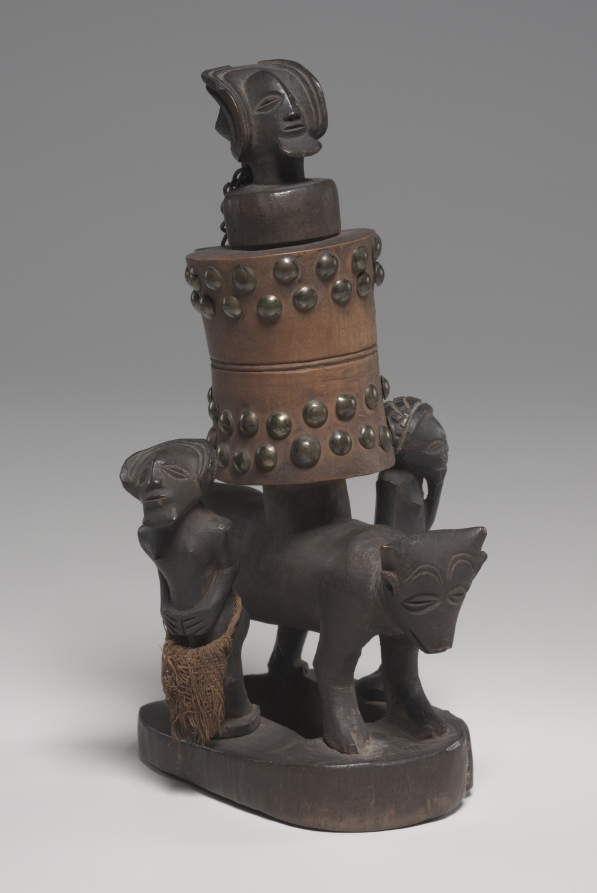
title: Snuff Mortar (Tesa Ya Ma Kanya)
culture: Africa, Central Africa, Angola or Democratic Republic of Congo, Chokwe carver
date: late 1800s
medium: Wood, upholstery studs, cloth, and metal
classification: Tool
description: Tobacco, introduced into Africa in the 16th century, became the prerogative of leaders. As patrons of the arts, Chokwe chiefs commissioned elaborate pipes and mortars as part of their court regalia for display during public gatherings.